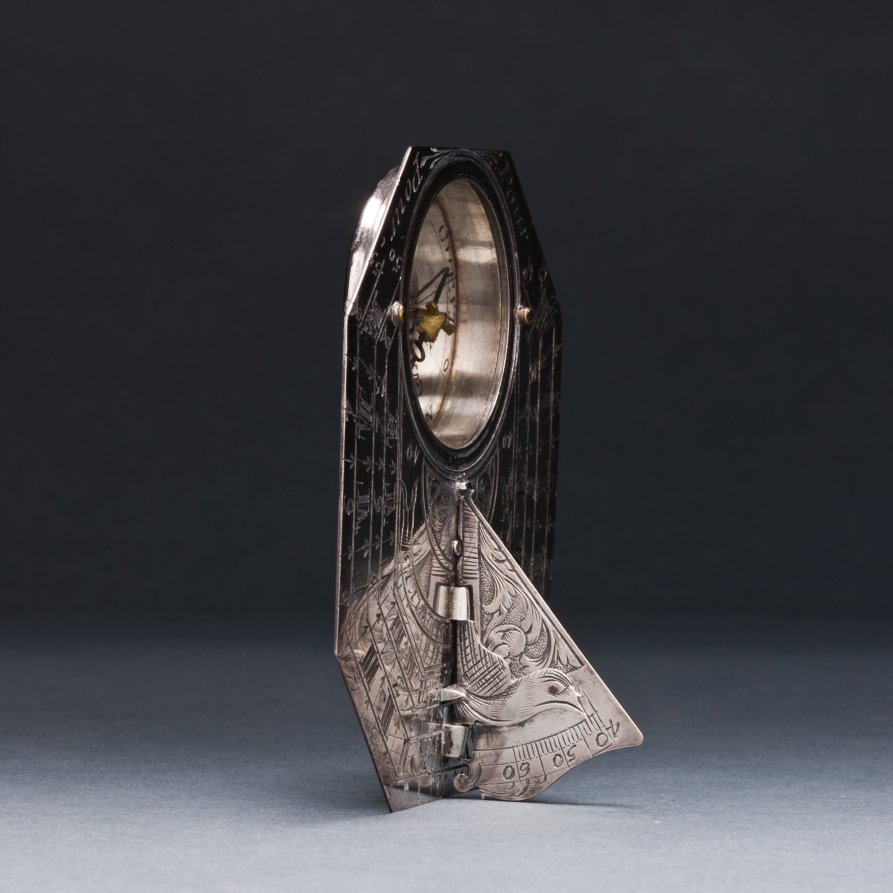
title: Butterfield Sundial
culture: France, 18th century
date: 1700s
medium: silver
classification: Silver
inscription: [Engraved signature above the compass in ribbon band]: "N. BION A Paris"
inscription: [Engraved on the face of the sundial]: “Pour 55° 4-5-6-7-8-9-10-11 50° IIII-V-VI-VII-VIII-IX-X-XI 45° 5-6-7-8-9-10-11 40° -VI-VII-VIII-IX-X-XI'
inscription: [Engraved on the other side]: "Pour 55° -8-7-6-5-4-3-2-1-0 50°-VIII-VII-VI-V-IIII-III-II-I 45°-8-7-6-5-4-3-2-1 40°-VII-VI-V-IIII-III-II-I"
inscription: [Engraved around the compass]: “NORD-OUEST-SUD-EST”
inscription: [Engraved on the back of the sundial]: “Turin 44 Milan 46 Paris 49 Lion 46 Metz 49 Rome 42 Liege 51 Naples 44 Namur 50 Gennes 44 Marseille 43 Grenoble 45 Bayonne 43 Bruxelle 51 Londres 52 Nantes 47 Vienne 48 Toulon 43 Tours 47 Lille 51”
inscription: [Engraved around the back of the compass]: “Venise 45 Strasbourg 49 Amsterdam 52 Hambourg 54 Varsovie 52 La Rochelle 46”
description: Butterfield-type sundials are characterized by their adjustable gnomons, metal flaps that cast a shadow on the dial’s face to indicate the hour, and geographical indices. This sundial has a scale adjustable between latitudes of 40° to 60° north. The latitudes of 26 European towns are engraved on its back for quick reference. With an intricately engraved silver face, it would have functioned as a fashionable traveler’s accessory.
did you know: Butterfield-style sundials were named after Micheal Butterfield, an English scientific and mathematical instrument maker who worked in Paris between 1674 and 1724.